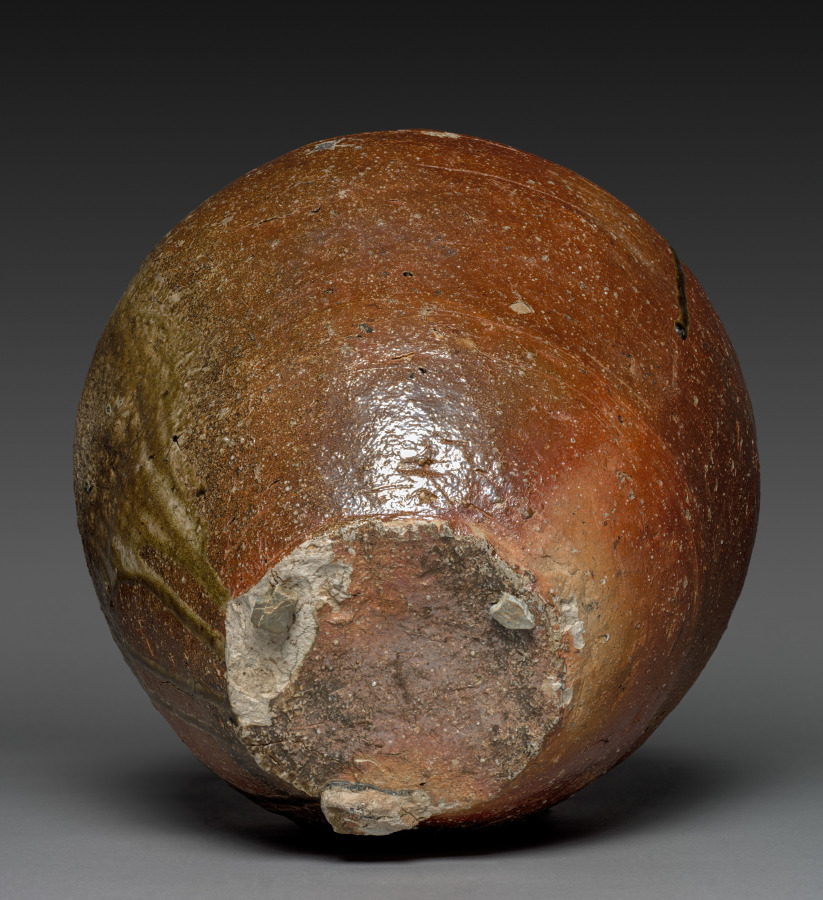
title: Storage Jar (Tsubo)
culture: Japan, Muromachi period (1392–1573)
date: 1400s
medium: Stoneware with natural ash glaze (Shigaraki ware)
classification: Ceramic